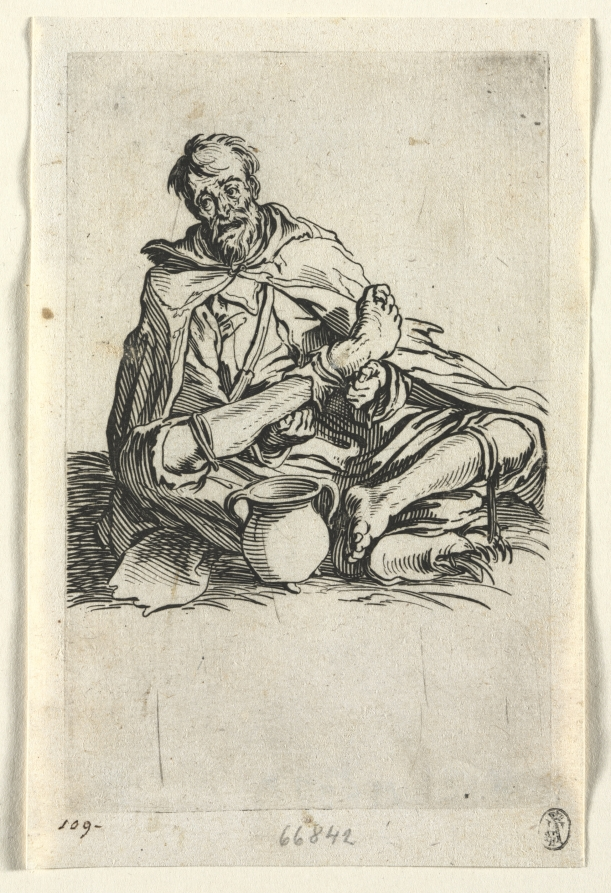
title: The Beggars: Malingerer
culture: France, 17th century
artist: Jacques Callot (French, 1592–1635)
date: c. 1623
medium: etching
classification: Print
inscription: Inscribed lower left in pen and brown ink: "109."